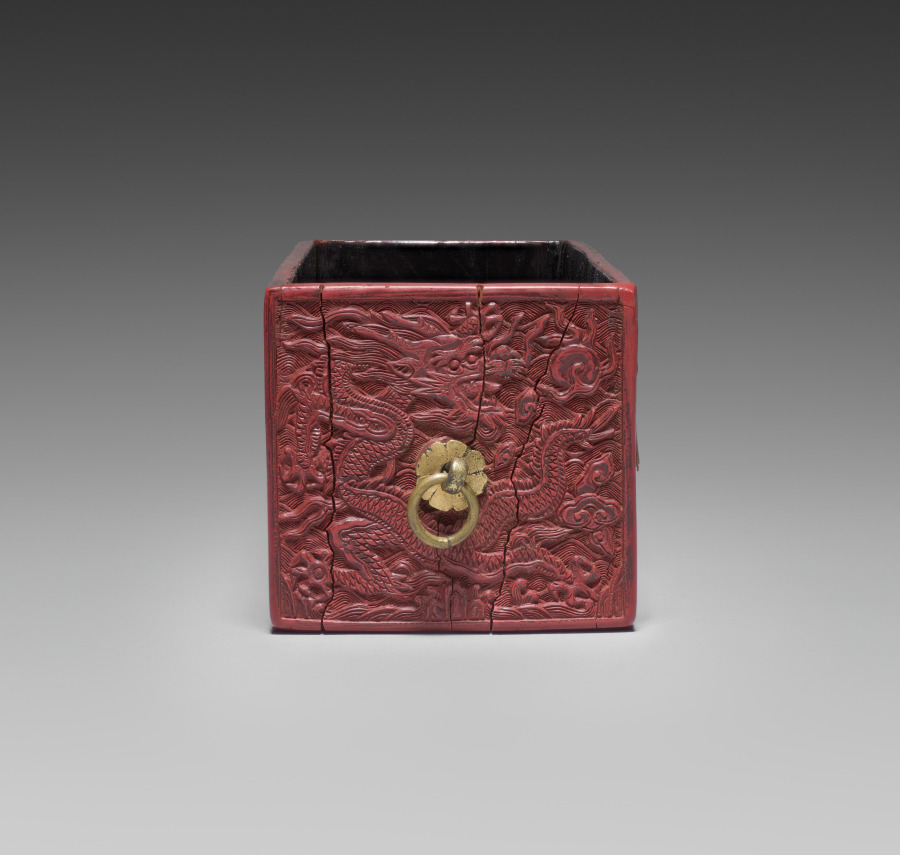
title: Drawer for a Tihong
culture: China, Ming dynasty (1368-1644), Wanli reign (1572-1620)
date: 1585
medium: carved cinnabar lacquer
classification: Lacquer